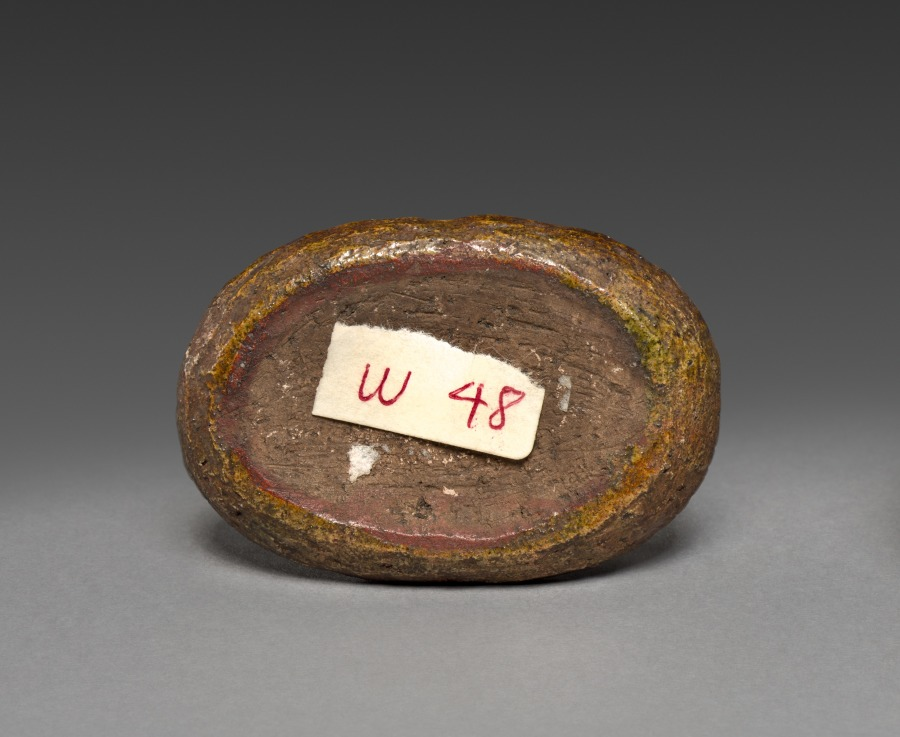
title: Box of Incense Container (Kōgō) in the Shape of a Bird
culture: Japan, Edo period (1615–1868)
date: c. 1700–1868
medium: pottery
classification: Ceramic